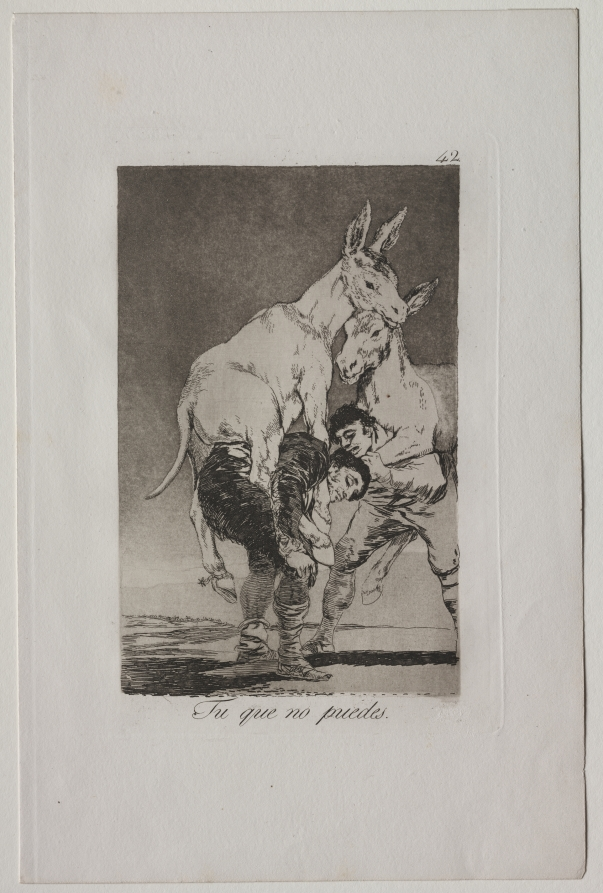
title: Thou Who Canst Not, Plate 42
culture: Spain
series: Los Caprichos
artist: Francisco de Goya (Spanish, 1746–1828)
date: 1799 (printed c. 1855)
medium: etching and aquatint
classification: Print